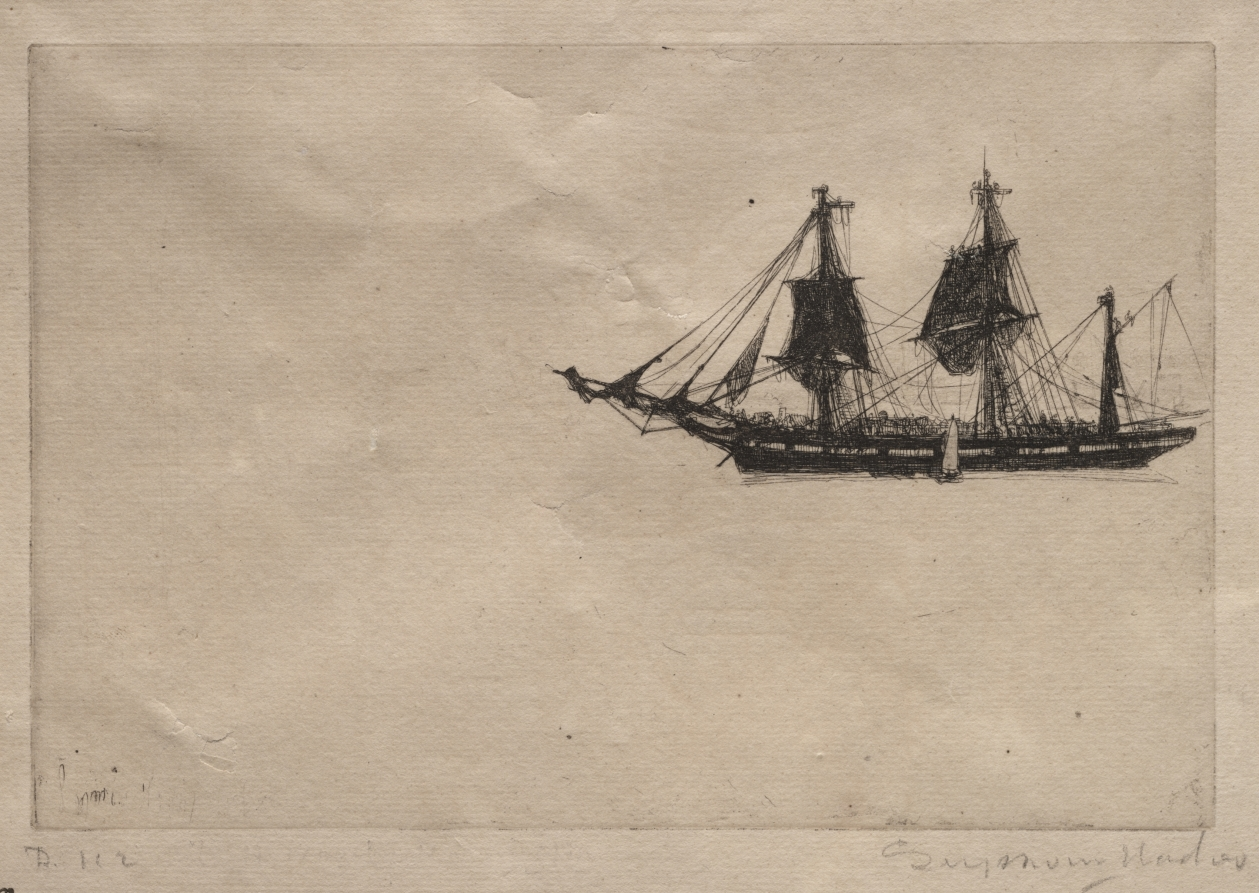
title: Bark Refitting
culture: England, 19th century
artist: Francis Seymour Haden (British, 1818–1910)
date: 1865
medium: etching and drypoint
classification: Print